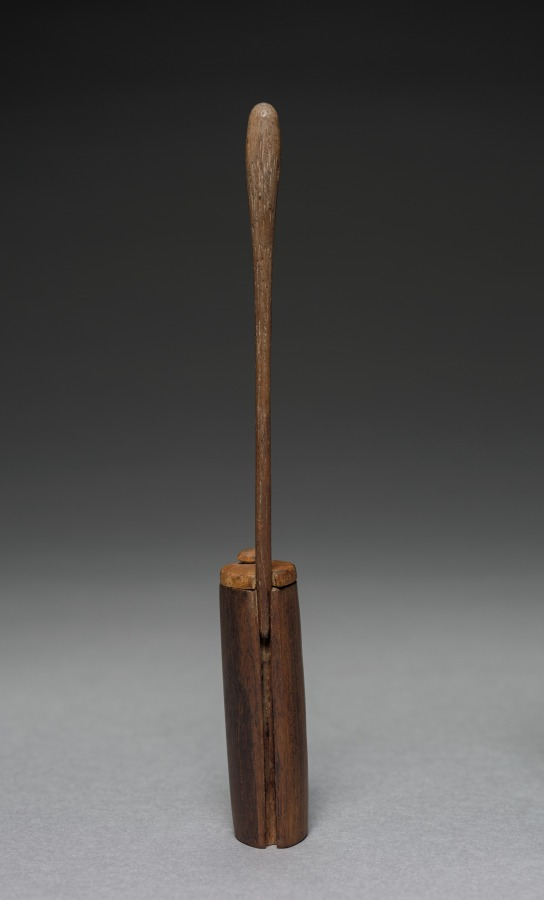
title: Kohl Container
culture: Egypt, New Kingdom (1540–1069 BCE), Dynasty 18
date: 1540–1296 BCE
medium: wood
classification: Cosmetic Objects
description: Cosmetic vessels would have once contained scented oils or ointments used for beautifying the body, while kohl containers held the eye paint seen in many depictions of ancient Egyptians. Galena, a mineral used in eye paint, helped reflect the sun and repelled insects and tiny organisms that could cause eye disease and blindness. Cosmetics were an essential element of daily life and associated with upholding the ancient Egyptians’ high standards of cleanliness.